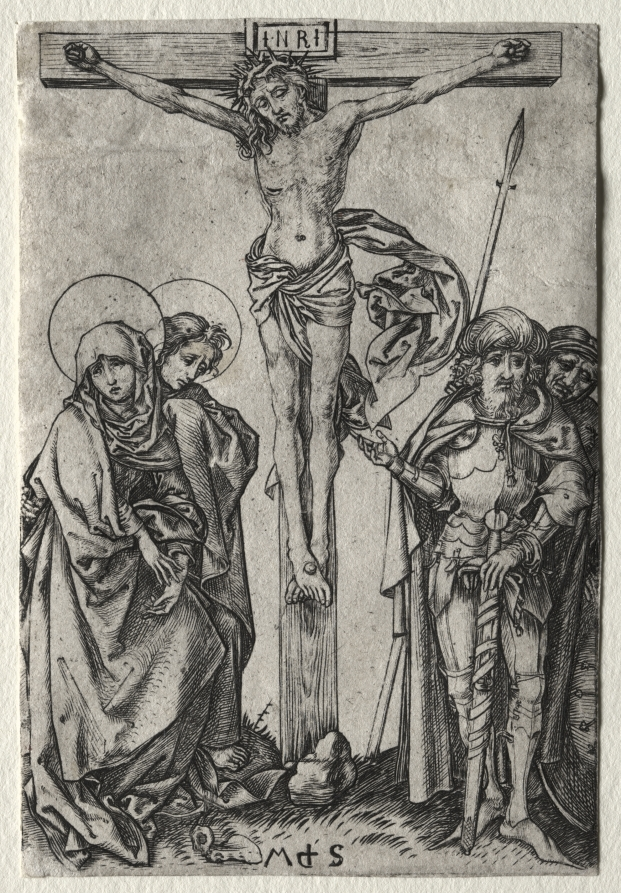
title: Christ on the Cross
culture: Germany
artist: Martin Schongauer (German, c. 1450–1491)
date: 1470–90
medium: engraving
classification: Print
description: Martin Schongauer engraved several variations of the Crucifixion, often inspired by fifteenth-century Netherlandish paintings of the same subject. Here, the thin and emaciated body of Christ hangs at the top of a central cross. On the left, saint John the Evangelist supports the fainting Virgin Mary. On the right, the Roman Centurion and the spear-bearing soldier Longinus (who would later stab Christ to make sure he was dead) look sorrowfully at the viewer and gesture toward Christ. The development of early printing methods during the fifteenth century offered more people personal devotional images that were previously limited to less affordable media, like paintings, sculptures, or illuminated manuscripts. Images of the Crucifixion like this functioned as devotional tools meant to help the faithful to meditate on Christ's sufferings, his sacrifice, and redemption of humanity.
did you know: According to tradition, both the Roman Centurion and the spear-bearer Longinus, seen here to the right of the cross, converted to Christianity at the time of Crucifixion.